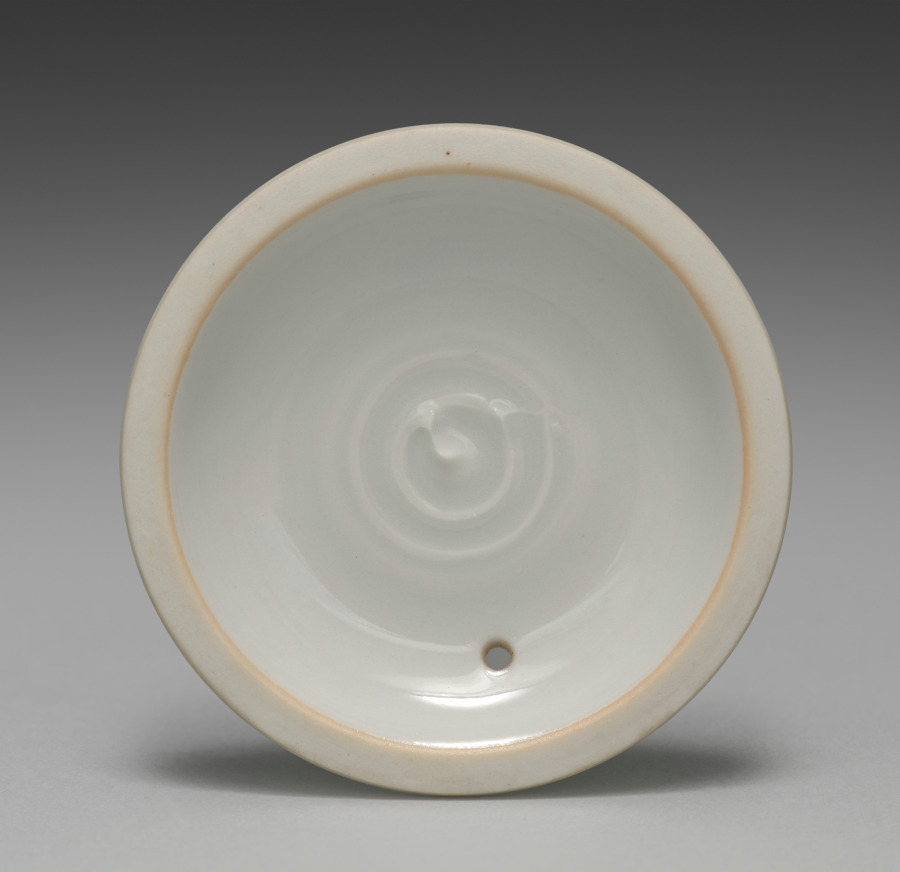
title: Lid for a Teapot with Chrysanthemums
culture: Japan, Meiji period (1868–1912)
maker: Seifū Yohei III (Japanese, 1851–1914)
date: 1912–14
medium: Porcelian with overglaze enamel and gold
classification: Ceramic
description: This teapot with recessed lid has a bold, realistic design of pale yellow and white chrysanthemums rendered in overglaze color enamels and dotted gold centers. Black contour lines define the yellow and white flowers and their green stems and leaves. Small pink and purple chrysanthemums are rendered as simple motifs, their shapes defined in contrast to the white ground of the pot.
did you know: This side-handled teapot is designed for brewing and serving sencha.